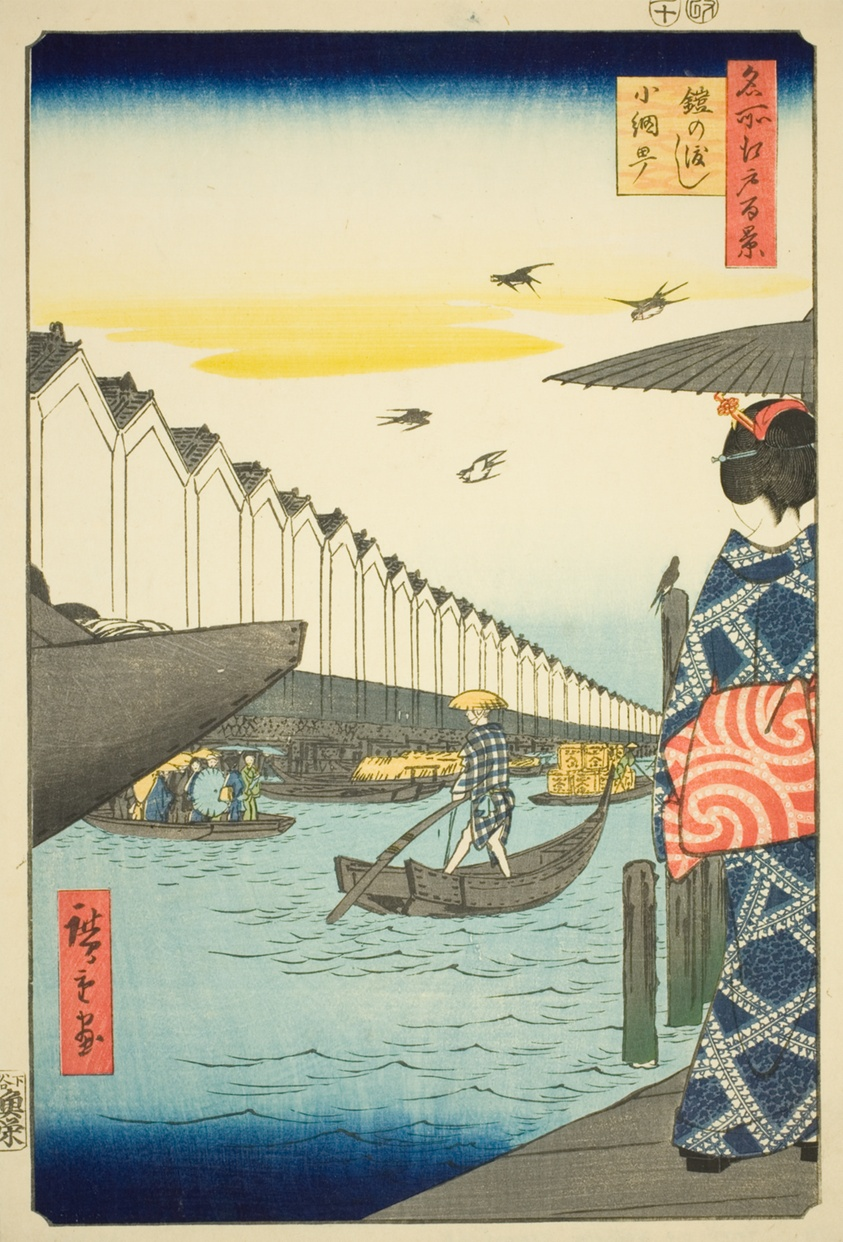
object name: Print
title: Yoroi Ferry, Koami-cho (Yoroi no watashi Koami-cho), from the series “One Hundred Famous Views of Edo (Meisho Edo hyakkei)”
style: Japanese (culture or style)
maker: Utagawa Hiroshige 歌川 広重; Japanese, 1797-1858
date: 1857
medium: Color woodblock print; oban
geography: Japan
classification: woodblock print; print; asian art